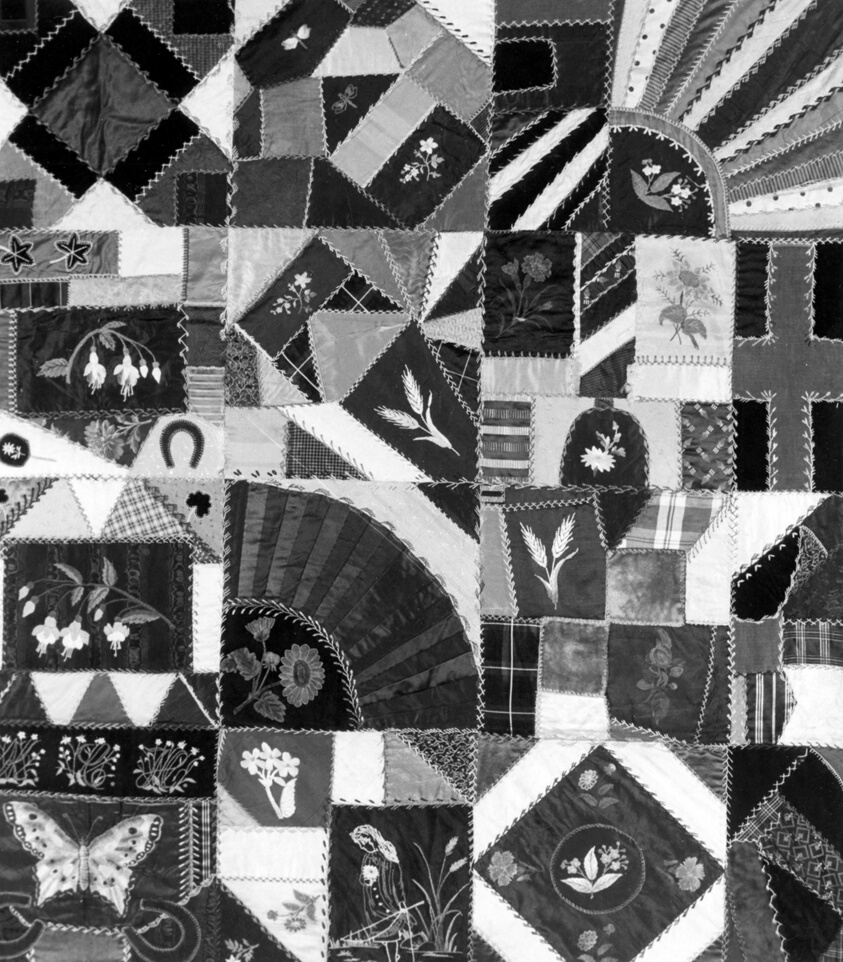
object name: Textile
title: Bedcover (Crazy Quilt)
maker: United States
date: c.1880/90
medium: Silk in a variety of weaves including cut velvet weave and a variety of techniques; painted; appliquéd; pieced, worked in squares; embroidered in silk threads in a variety of stitches; backed with cotton, plain weave, roller-printed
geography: United States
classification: textile; needlework - quilt